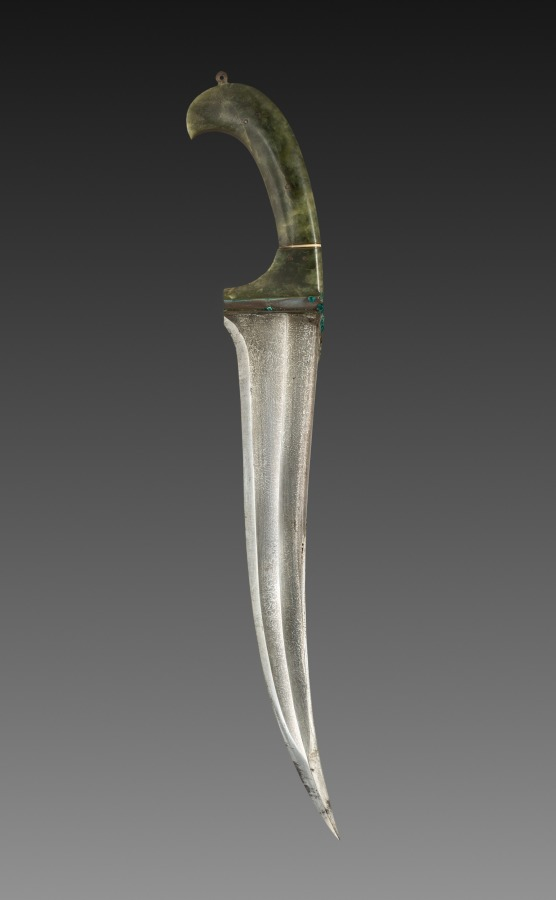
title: Dagger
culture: India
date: 1800s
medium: iron with bone and silver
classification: Arms and Armor